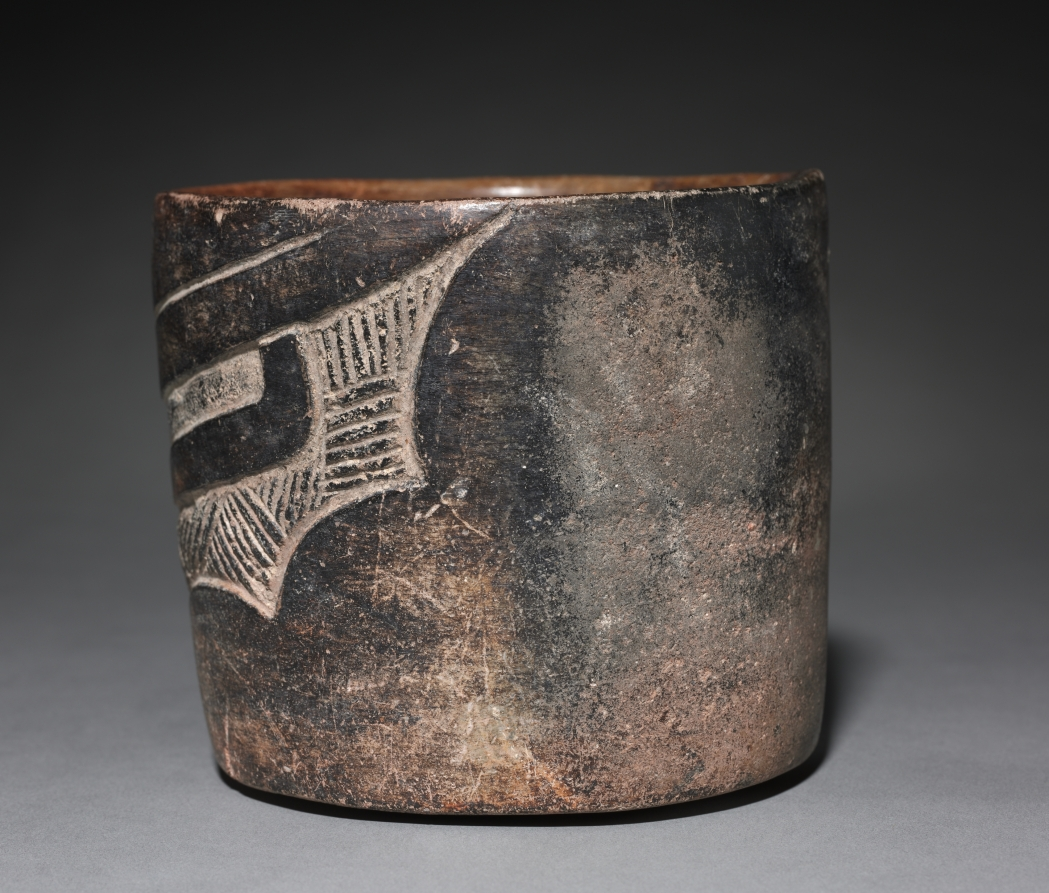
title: Carved Bowl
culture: Mexico, Central Highlands, Olmec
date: 1200–900 BCE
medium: earthenware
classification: Ceramic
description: Although the Olmec heartland is located on Mexico's Gulf Coast, sites with Olmec-style architecture and sculpture are also found in the highlands of Central Mexico. Small-scale Olmec works in jade and pottery are even more widely distributed; their ownership probably conferred great prestige.